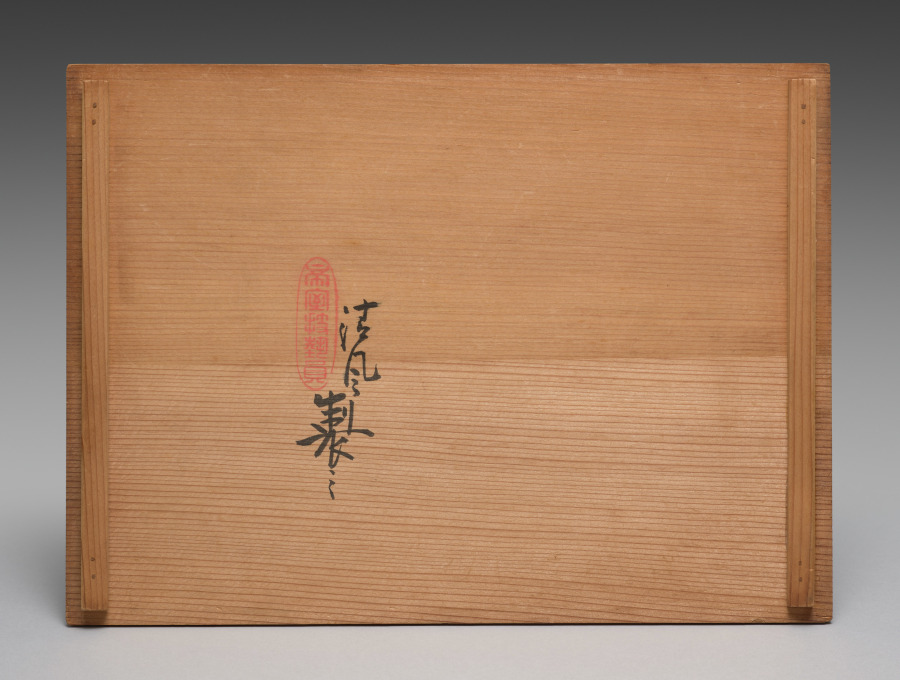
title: Tea Set with Chinese Landscapes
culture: Japan, Meiji period (1868–1912)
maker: Seifū Yohei III (Japanese, 1851–1914)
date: 1893–1914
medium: Tea set with tea pot, hot water cooler, and five cups; porcelain with underglaze blue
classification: Ceramic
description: The theme of this sencha tea set is the Chinese scholar-recluse in an idyllic landscape. The teapot depicts two friends playing a board game on a promontory beyond a two-storied residence, while another figure comes across the entry bridge bearing bags of provisions, hung from the ends of a pole balanced across his shoulders. The kidney-shaped water cooler has a scene of a man gazing at a full moon in a dramatic mountain-scape stretching before a large compound in the woods. Another man, hunched over and carrying a heavy parcel tied to a pole over his shoulder, struggles to make his way up a hill to the site. The cooler also has a pair of applied nyoi staff-head forms for resting the tips of one’s thumb and index finger, like those on the water cooler with pine trees (see [19 ]). Each of the five teacups has a landscape with an architectural structure and some human activity. One cup shows a man with a staff walking away from a residence toward a boat, loaded with what might be a musical instrument wrapped for travel. A second cup shows a man rowing a little skiff, which disturbs the otherwise still water. Behind him in the distance is an open-air pavilion. He is making his way toward a pair of figures playing a board game, much like the scene on the teapot. Down the hill from them is a residence; beyond this, a flock of geese approaches through the sky. A third cup shows a man in a traveling robe leaning upon his staff as he crosses a bridge to reach a two-story building with a pitched roof, possibly a temple, set between trees. Past this structure, another man sits fishing in a boat. A fourth cup shows a humbly dressed man with a broad-brimmed hat lugging a package tied to the end of a rod slung over his shoulder. In front of him is a two-story building flanked by deciduous trees and a man resting against the side of a sturdy stone bridge as he looks at a residence, or perhaps a set of roofed gates, further up the path. The last cup has a man walking toward a group of three pavilions announced with a banner hanging from a tall post; beyond this are two large deciduous trees sheltering a stand of small conifers. Across the water from this site is another man sitting on the bank fishing with a large woven basket for his catch beside him.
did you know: Images of famous sencha events that shows that these kinds of porcelains fit with objects, such as a stove and kettle, to form a complete set of utensils for tea preparation, and with ensembles of decorative objects meant to inspire creativity.